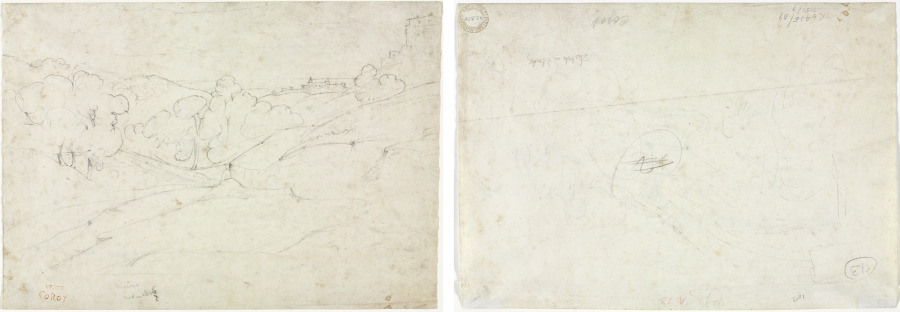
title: View of Marino (recto); Sketch for a Landscape (verso)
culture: France, 19th century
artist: Jean Baptiste Camille Corot (French, 1796–1875)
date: 1827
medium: graphite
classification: Drawing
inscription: [by artist?], lower left, in graphite: Marino / Nov - 1827 [in a later hand?: 6 written over the 7]